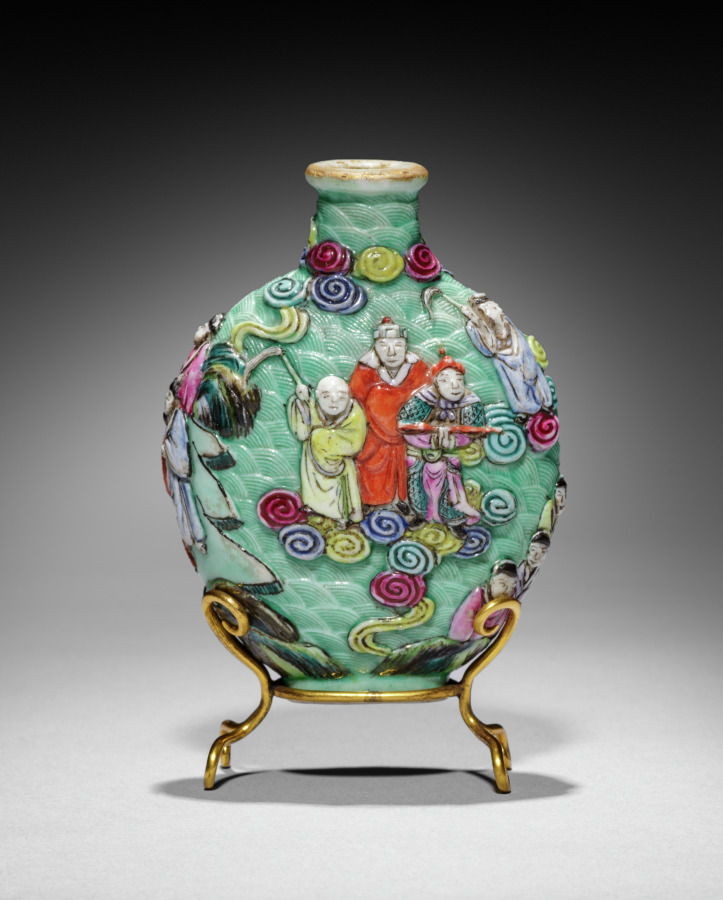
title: Flattened Ovoid Snuff Bottle with Stopper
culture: China, Qing dynasty (1644-1911), Jiaqing reign (1796-1820)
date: 1796–1820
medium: porcelain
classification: Ceramic